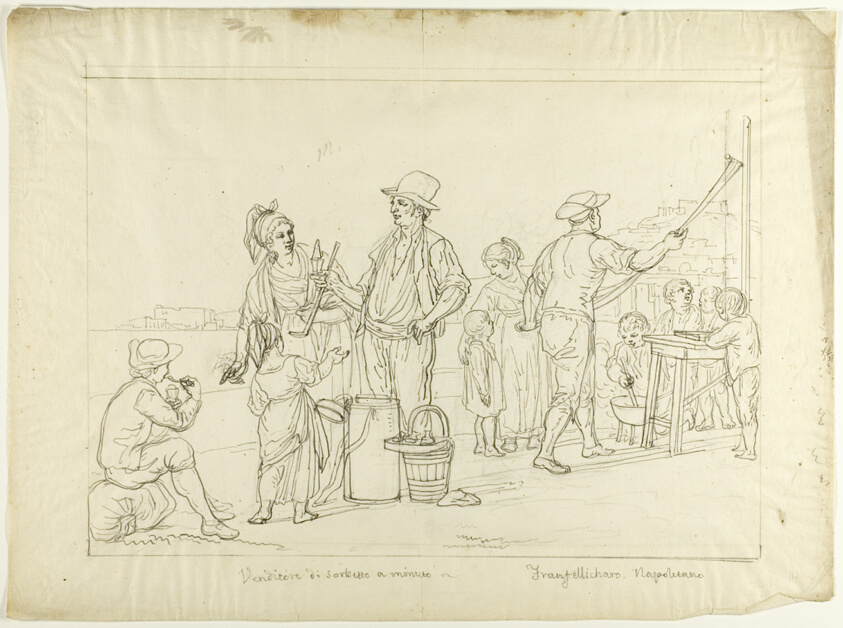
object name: Drawing and Watercolor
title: Vendors of Gelati and Caramelle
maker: Saverio della Gatta (Italian, active 1777-1811)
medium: Pen and black ink, over traces of graphite, on cream laid paper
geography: Italy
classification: pen and ink drawings; drawings (visual works); prints and drawing